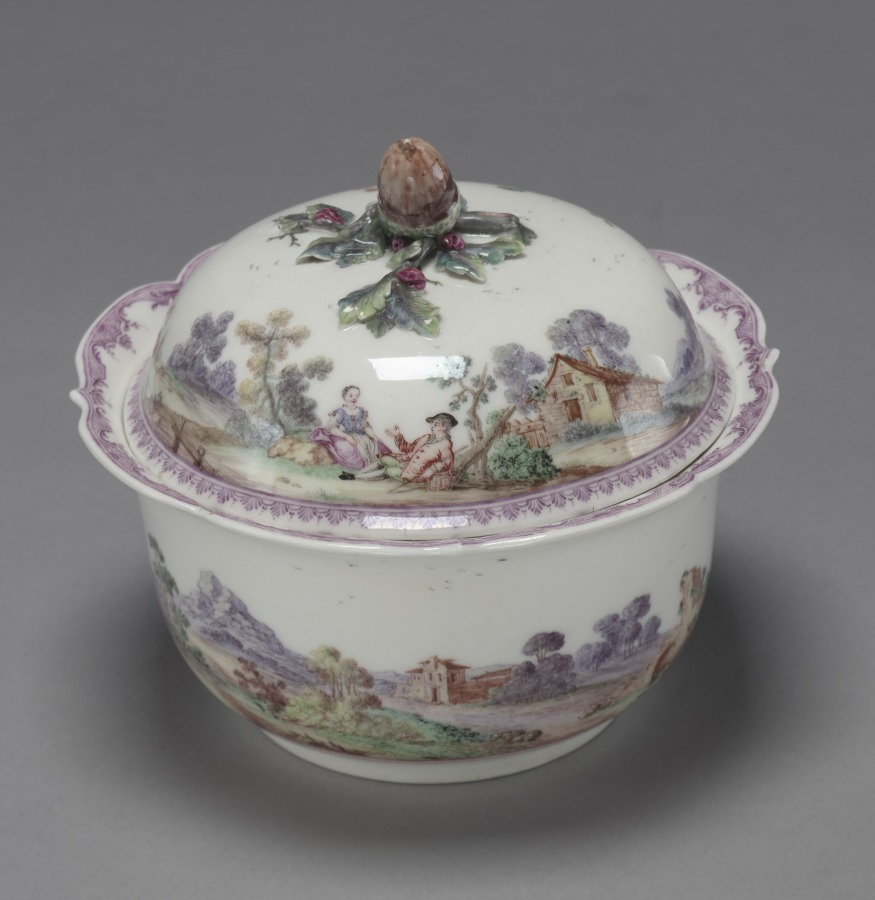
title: Covered Sugar Bowl (Pot à sucre)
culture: France, Vincennes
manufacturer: Vincennes Porcelain Manufactory (French, 1740–1756)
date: 1745–48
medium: soft-paste porcelain with enamel decoration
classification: Ceramic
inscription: In red on bottom of bowl: P.M. In red on interior of lid: P.M. 16 4.8B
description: This covered bowl, likely intended for sugar, is one of the earliest surviving examples of Vincennes porcelain, a reputed French factory moved to Sèvres in 1756. The continuous landscape is painted on this object en pointillé, a method by which a painter forms images with tiny dots. This style may have been influenced by their German competitors at the Meissen Porcelain Factory.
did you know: Three separate shades of purple, one of the most expensive colors to produce on porcelain during this time, are used extensively in this object’s paintings.